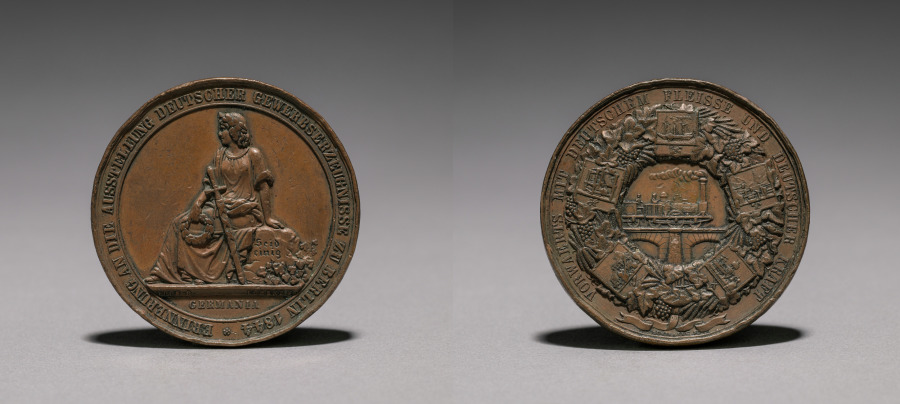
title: Medal Commemorating the Exhibition of Textiles, Berlin, 1844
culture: Germany, 19th century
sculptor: Emil Schilling (German)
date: 1844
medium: bronze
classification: Metalwork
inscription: "ERNNERUNG AN DIE AUSSTELLUNG DEUTSCHER GEWERBSERZEUGNISSE ZU BERLIN 1844 GERMANIA."